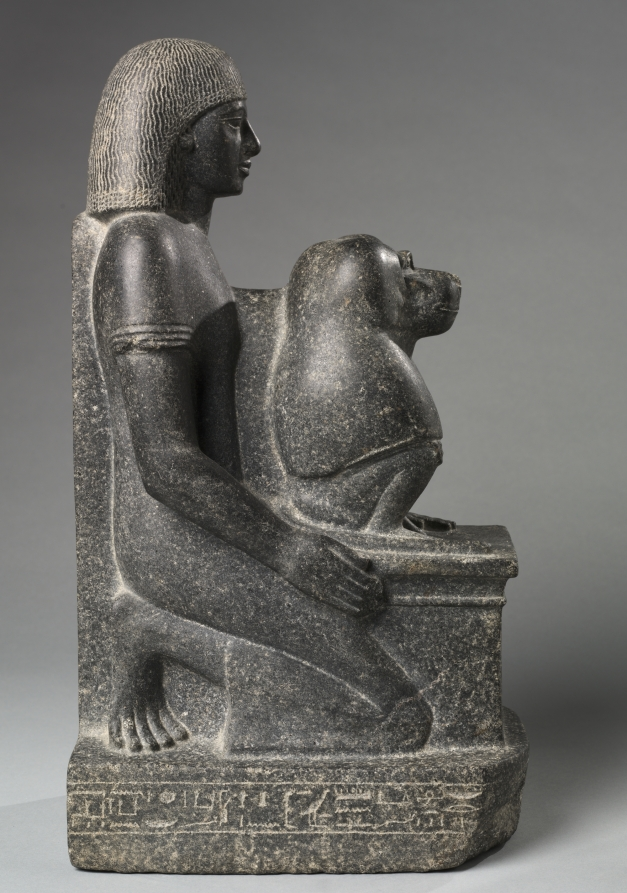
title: Statue of Minemheb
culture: Egypt, New Kingdom (1540–1069 BCE), Dynasty 18, reign of Amenhotep III (1390–1352 BCE)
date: c. 1391–1353 BCE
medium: granodiorite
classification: Sculpture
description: Minemheb was one of the many court officials who helped prepare for Amenhotep III's 30-year jubilee festival. Clearly, Minemheb regarded this as the high point of his career, since his title as chief of construction for the jubilee temple is the primary one provided on this statue. It is actually a statue within a statue: Minemheb kneels to present a small altar, upon which squats a statue of the god Thoth in baboon form. Carved in extremely hard stone, Minemheb's statue is nonetheless carefully detailed and superbly modeled. Special attention was given to the rendering of the baboon's face. The heavy-lidded eyes and furrowed brow give the animal an almost contemplative expression.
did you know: The baboon in this sculpture is the god Thoth in one of his animal forms.